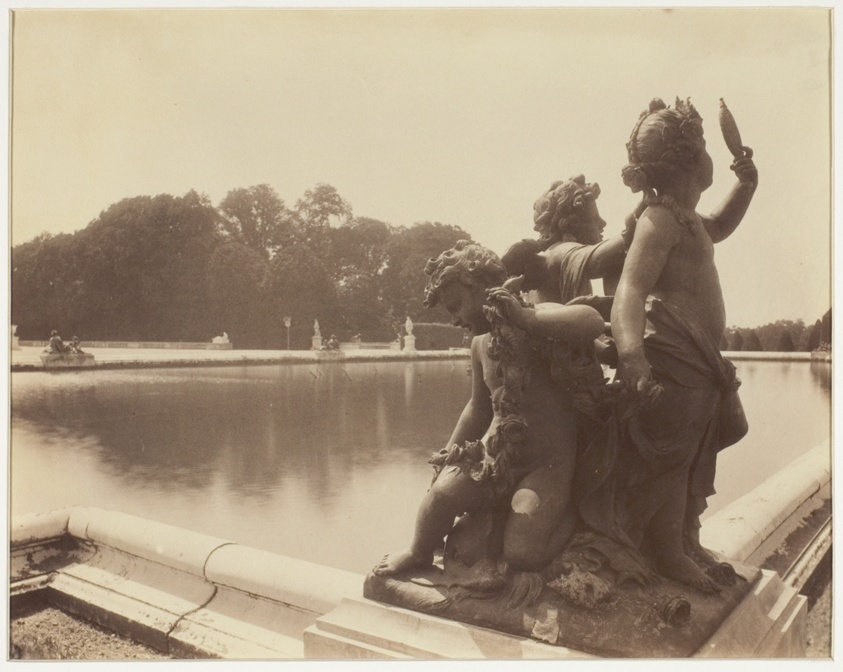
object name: Photograph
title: Versailles, Bassin de Midi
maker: Jean-Eugène-Auguste Atget (French, 1857–1927)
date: 1901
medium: Albumen print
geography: France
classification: albumen silver print; photographic process; photography; photograph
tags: Collected by Hugh Edwards